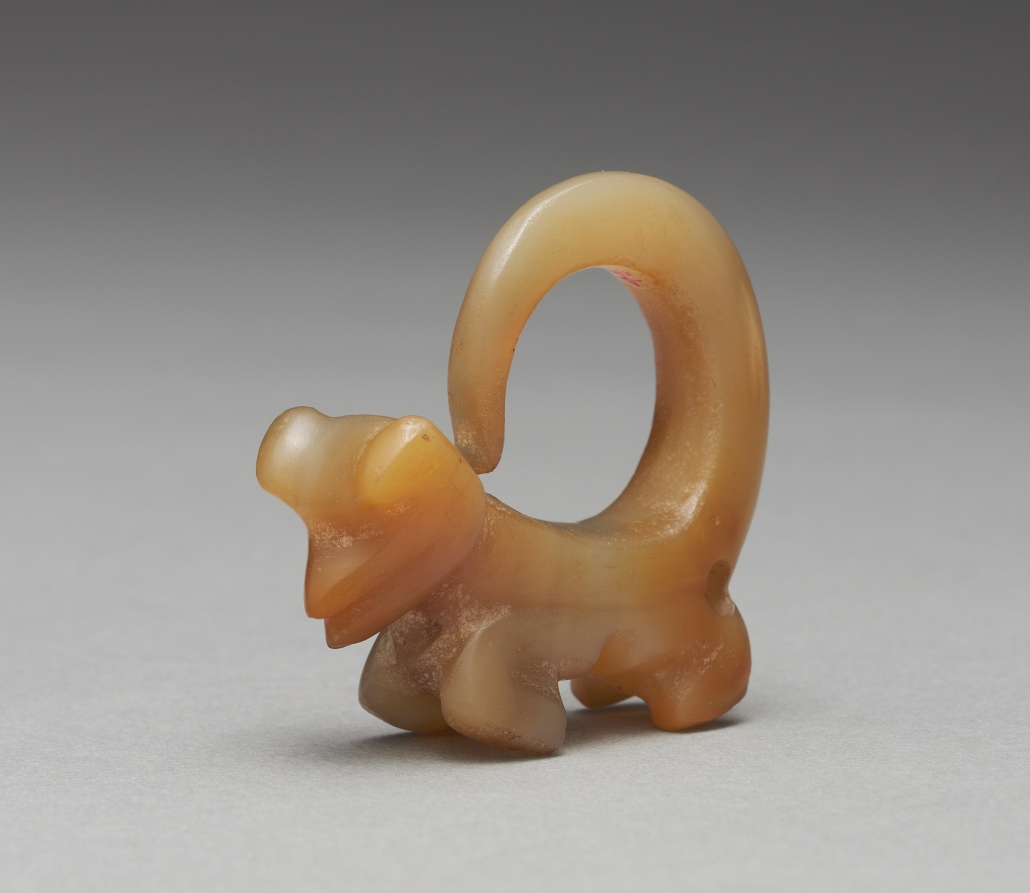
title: Curly-Tailed Animal Pendant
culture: Panama, Initial style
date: 100–800 CE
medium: agate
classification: Sculpture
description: A favored Initial-style subject is a charming animal whose curly tail-its most impressive feature-may derive from a monkey's. Its other traits vary considerably, causing it to be identified as everything from a dog to a duck. Initial-style gold ornaments represent Panama's oldest metalwork. Since metal technologies appeared suddenly and fully developed in Panama, it is likely that they were introduced from the outside, probably from Colombia to the south.